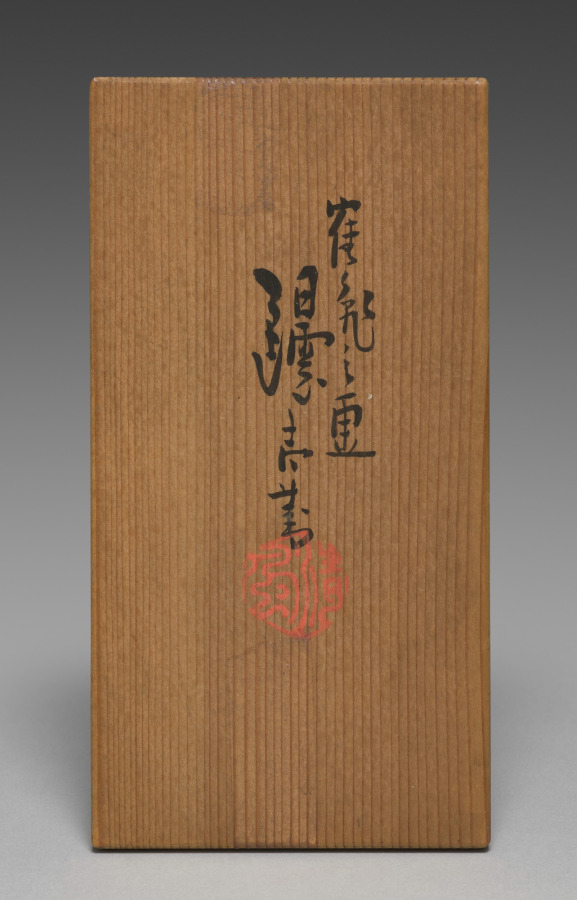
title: Sake Pourers with Crane and Tortoises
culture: Japan, Meiji period (1868–1912)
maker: Seifū Yohei III (Japanese, 1851–1914)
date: 1893–1914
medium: Pair of sake flasks; porcelain with overglaze color enamel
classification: Ceramic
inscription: 爭食羣雞前，同遊者同志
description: One flask of this pair has stencil-like paintings of three turtles—a young one with its parents—while the other has a crane with a leg raised. Cranes and turtles are well-recognized symbols of longevity in East Asia, with the turtle said to live for ten thousand years and the crane for one thousand. Each flask also has a poem on the back, one in Chinese and the other in Japanese. The latter, which appears on the turtle flask, reads kame iwaku kamiyo wa, ore no wakaki toki. The seventeen-syllable poem begins with “turtle” and ends with “when I was young.” It can be translated as, “the turtle said the world of the gods began when I was young.” The poem on the crane flask is two nonconsecutive five-character lines from a poem called “Crane Feelings” by the famous Tang dynasty poet Bai Juyi (772–846). One character in one of the lines has been altered. This creative poetic sampling results in a verse reading zheng shi qun ji qian, tong you zhe tong zhi 爭食羣雞前，同遊者同志. It could perhaps be translated, “before the flock of chickens competing for food, those traveling together have the same ambitions.”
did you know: This pair of seemingly humble sake pourers celebrate longevity and delight in a literary tradition that embraces multiple forms of poetic expression.